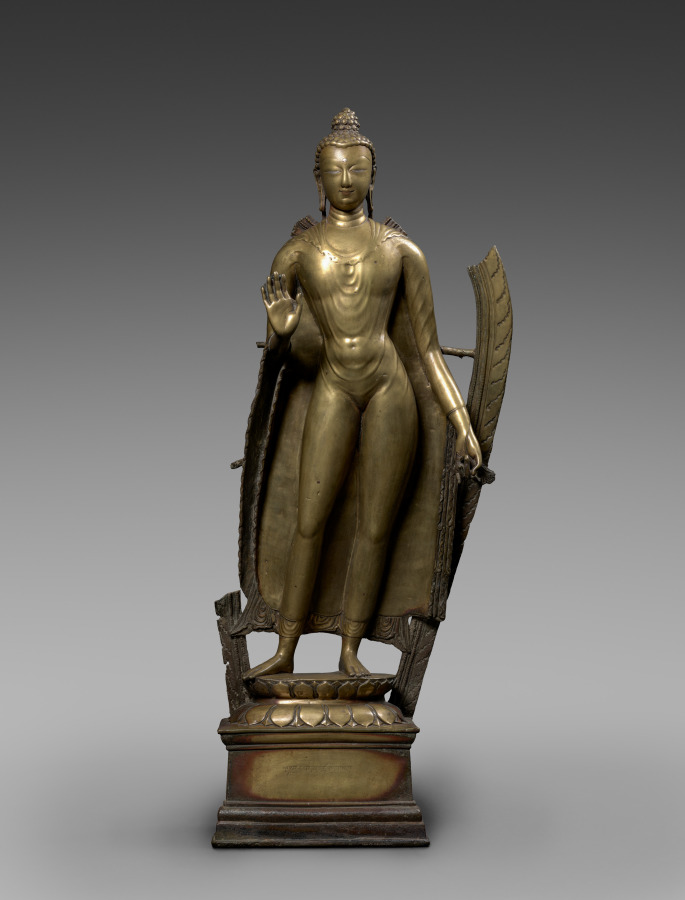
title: Standing Buddha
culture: India, Kashmir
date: c. 900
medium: brass with silver and copper inlay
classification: Sculpture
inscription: inscribed with the name of the monk who owned it: Lhatsun Nagaraja (active from c. 998 to 1026)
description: The slender athletic Buddha extends one foot slightly off the lotus pedestal, suggesting his humanity enters our world from his transcendent state. With his right hand he signals that we should have no fear. The smooth signs of wear on the sculpture indicate that it was worshiped in Kashmir, where water and other ablutions were poured over sacred images during rituals. The Tibetan inscription on the pedestal states that it belonged to a royal monk named Nagaraja (Tibetan, active about 998–1026). Sculptures like this contributed to the transmission of Buddhism from India to Tibet and served as artistic models.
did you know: The Buddha grasps the end of his robe in his left hand.